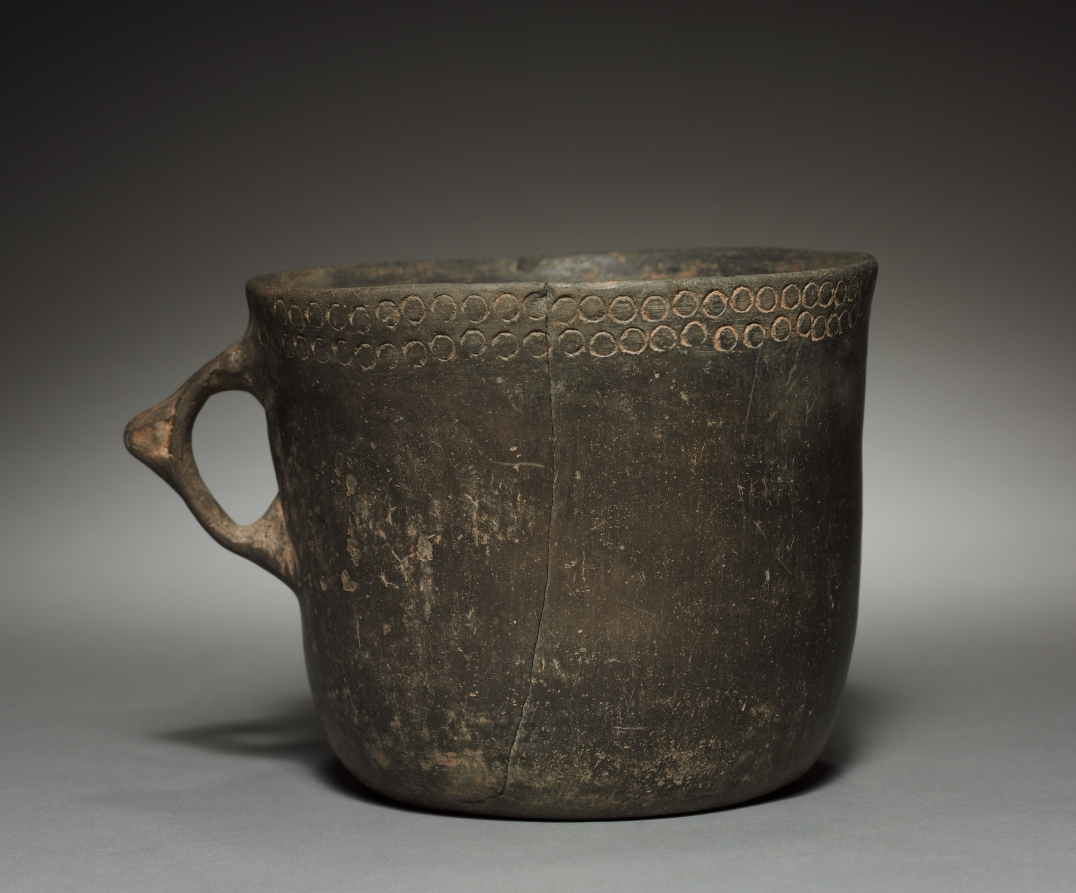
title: Drinking Vessel with Handle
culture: Argentina, Cienga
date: c. 600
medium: earthenware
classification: Ceramic